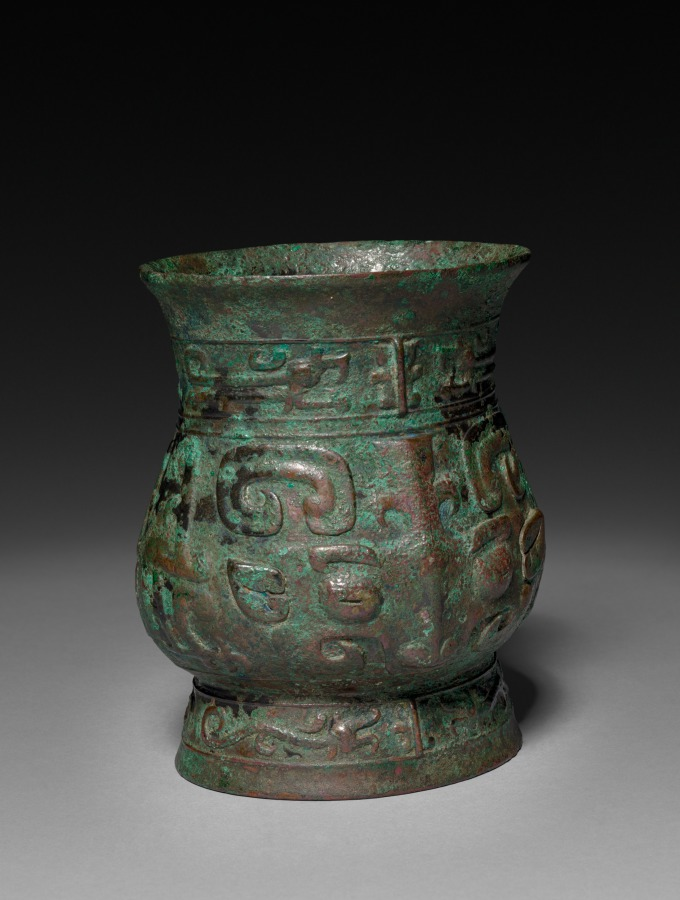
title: Zun: Ceremonial Vessel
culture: China, Zhou dynasty (c. 1046–256 BCE)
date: c. 1023–900 BCE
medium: bronze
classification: Metalwork